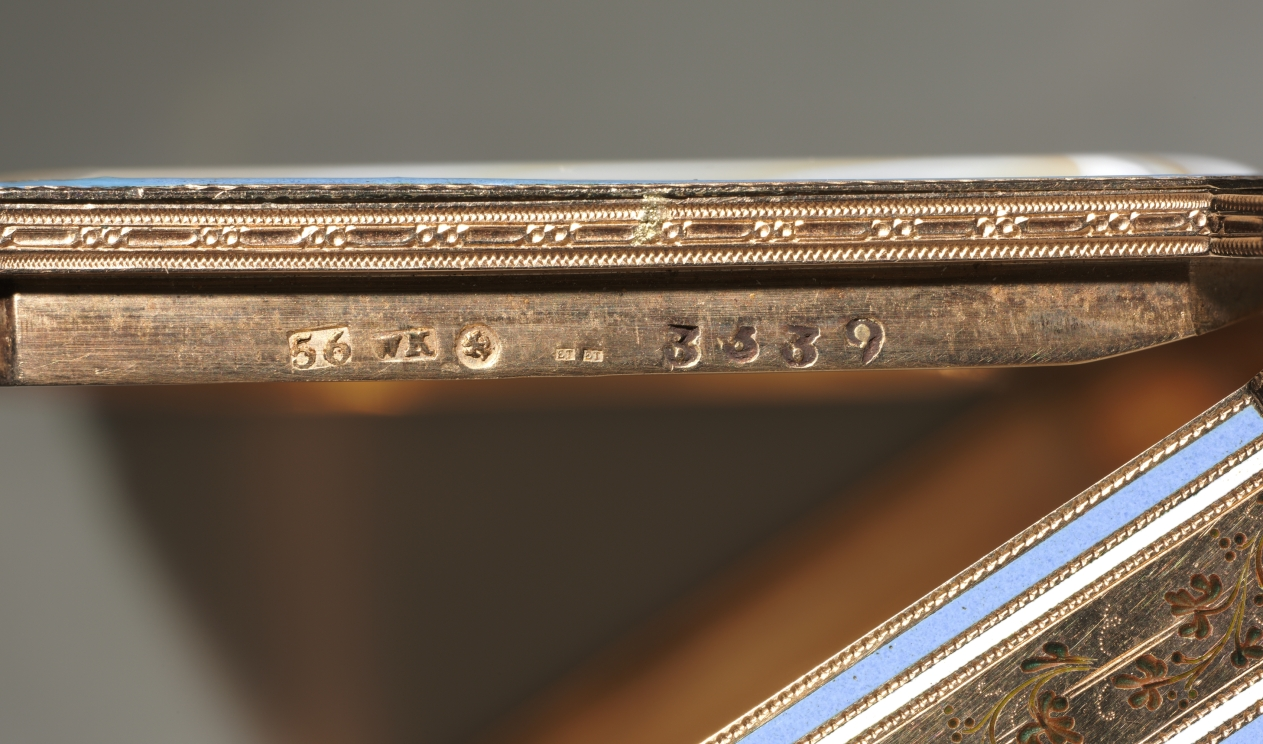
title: Snuff Box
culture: Switzerland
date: 1800–1815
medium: striated agate in gold and enamel mounts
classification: Miscellaneous